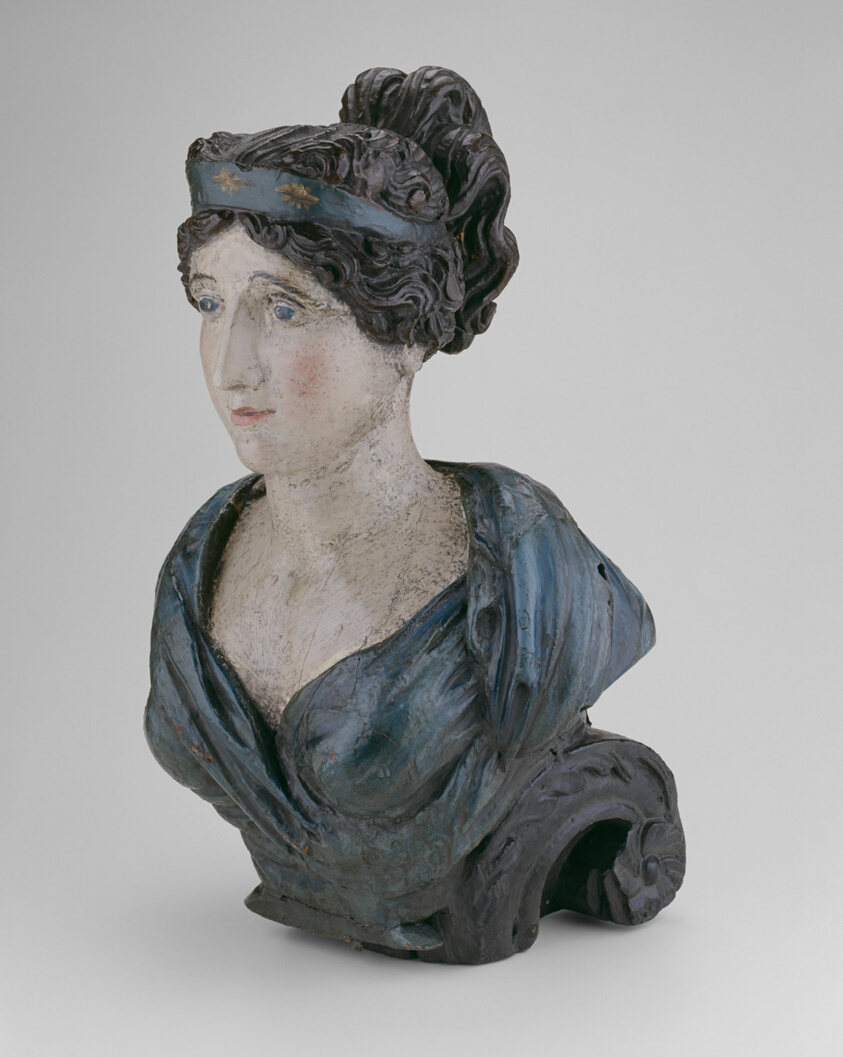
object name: Decorative Arts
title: Ship Figurehead: Female Bust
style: Folk Art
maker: Artist unknown (American, 19th century)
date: 1800–15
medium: White pine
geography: United States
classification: sculpture; american decorative arts; american arts; decorative arts